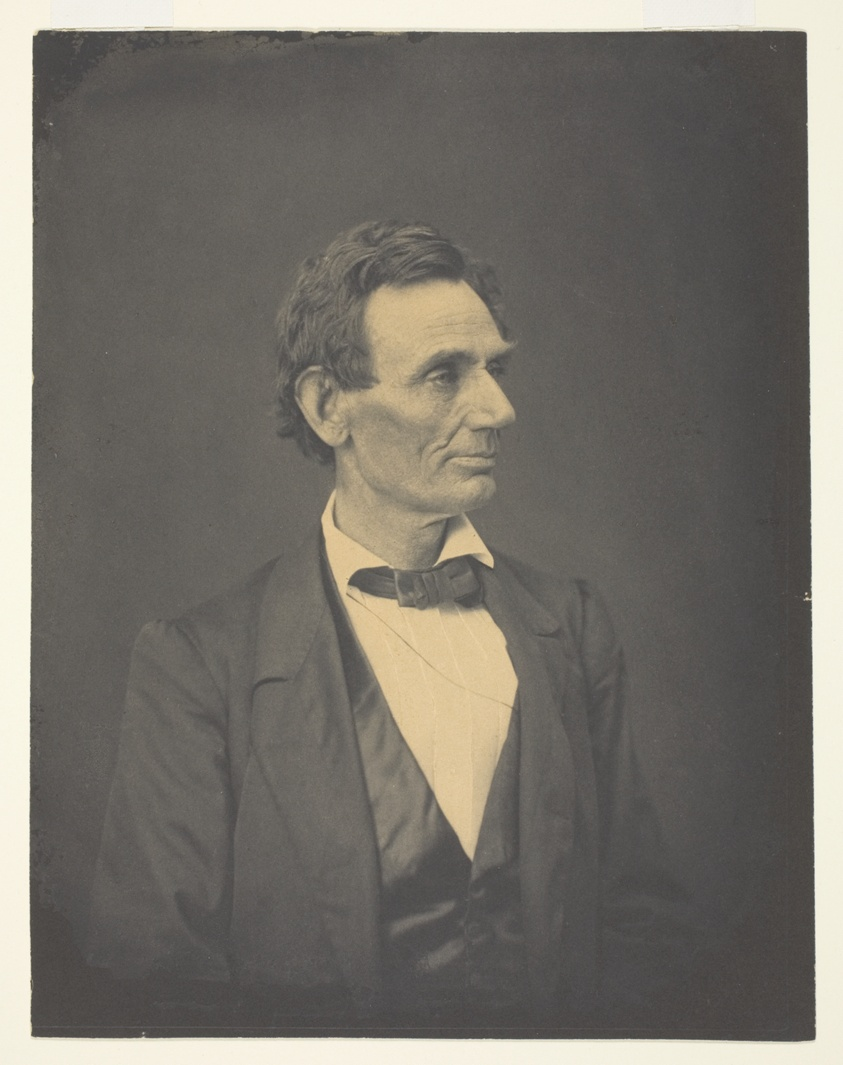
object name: Photograph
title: Abraham Lincoln, Springfield, Illinois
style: 19th century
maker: Alexander Hesler (American, born Canada, 1823–1895); printed by George B. Ayers (American, 1829–1905)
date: June 3, 1860, printed c. 1880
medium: Platinum print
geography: United States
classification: platinum print; photographic process; photography; photograph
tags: portraits, photography